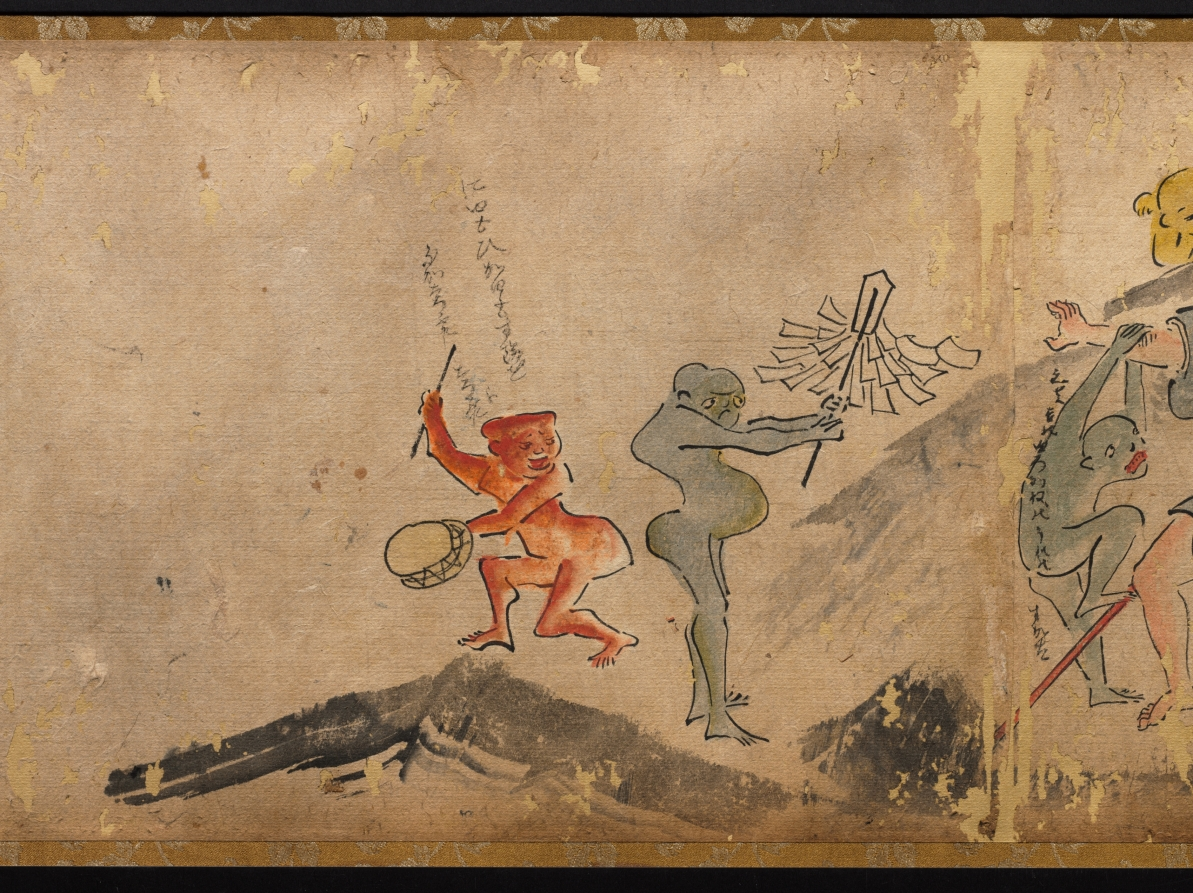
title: The Illustrated Tale of Oishi Hyōroku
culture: Japan, Edo period (1615–1868)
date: 1700s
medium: handscroll; ink and color on paper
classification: Painting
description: This incomplete handscroll illustrates part of the story of Oishi Hyoroku, a young man tasked with battling fox apparitions who were creating problems in his town. In other extant versions of the scroll, the story is set in the fall of 1624 in Kagoshima in southern Japan. Throughout the story, Hyoroku is tricked and terrified by the foxes that shift their shapes into a variety of monstrous phantoms. After repeated humiliations, he eventually captures two of the foxes. In this version, colloquial texts that function like text blurbs in comics appear throughout the scroll, but the main text is missing.